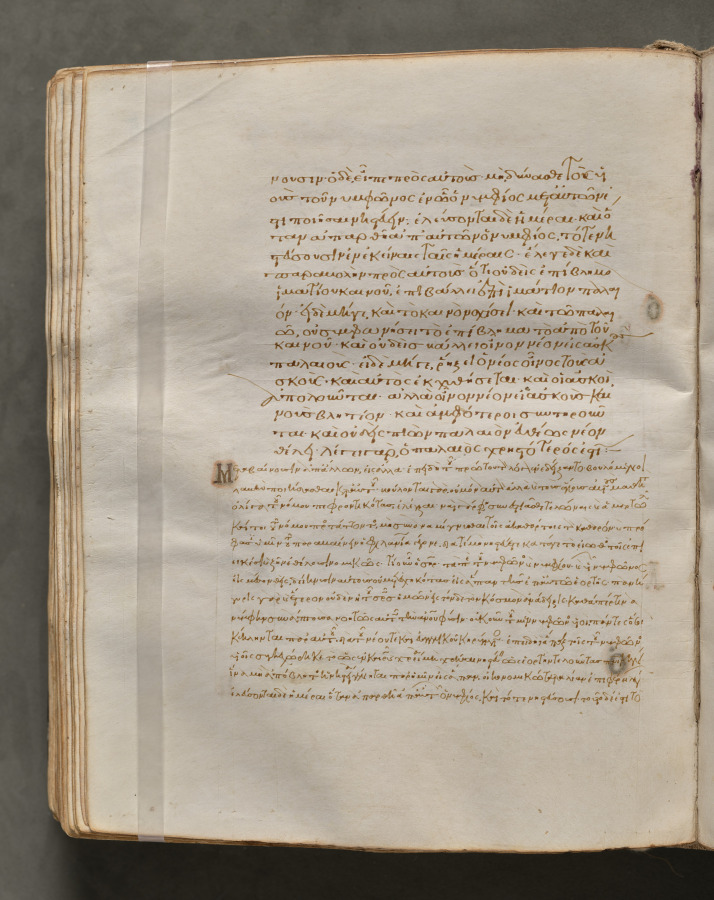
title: Text, folio 225 (verso), from a Gospel Book with Commentaries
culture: Byzantium, Constantinople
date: c. 1000–1100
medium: ink, tempera, and gold on vellum; leather binding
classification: Bound Volume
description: Each of the four gospels in this book opens on a page with brilliantly illuminated borders depicting the author of the text as well as birds-principally peacocks, symbols of the immortality of the soul-and fountains, representing the fountain of life and the salvation of the soul. This volume consists of 428 leaves with texts in Greek. Its level of sophistication suggests that it was probably written and decorated in a monastery in Constantinople.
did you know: Gospel Books were carried in procession through Byzantine churches.